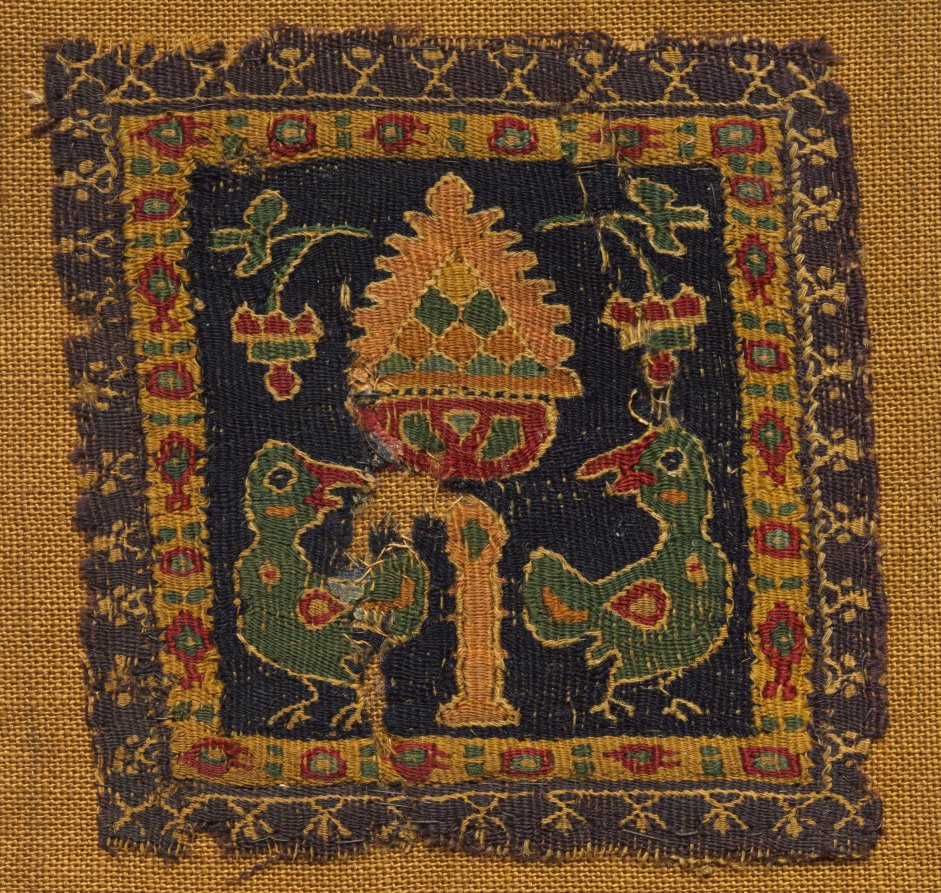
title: Square Segmentum with Two Birds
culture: Egypt, Byzantine period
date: 400s - 500s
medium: tapestry; linen and wool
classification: Tapestry